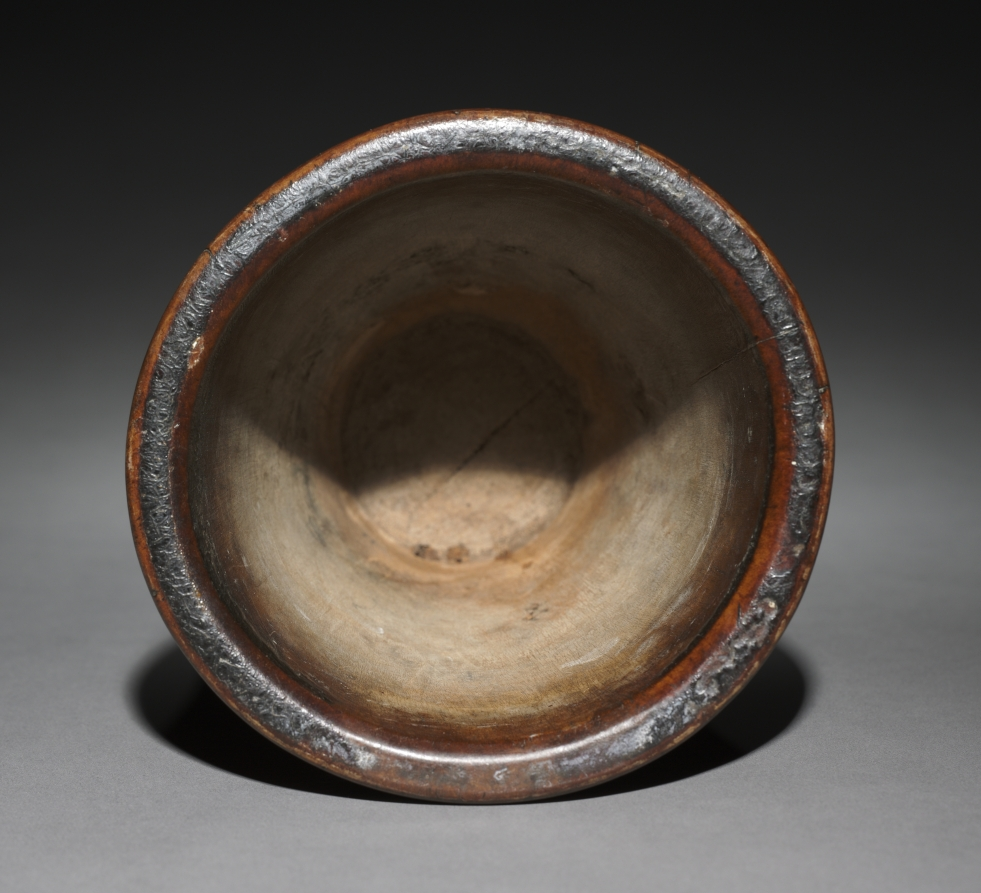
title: Kero (Waisted Cup)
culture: Peru, Colonial Inka style, 16th century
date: after 1550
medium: wood, inlaid pigments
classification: Wood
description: Keros, used to drink the maize beer chicha, were essential items of Inka statecraft. Made and used in pairs, they reflect the important Andean concept of reciprocity. Native use of keros continued in the colonial period, the date of these two examples, which come from separate pairs. The example with geometric motifs is closest to pre-conquest models. On the second, two armies converge: the Inka, dressed in tunics with waistbands, and their opponents, perhaps jungle people whose body parts are heaped in a centerpiece.